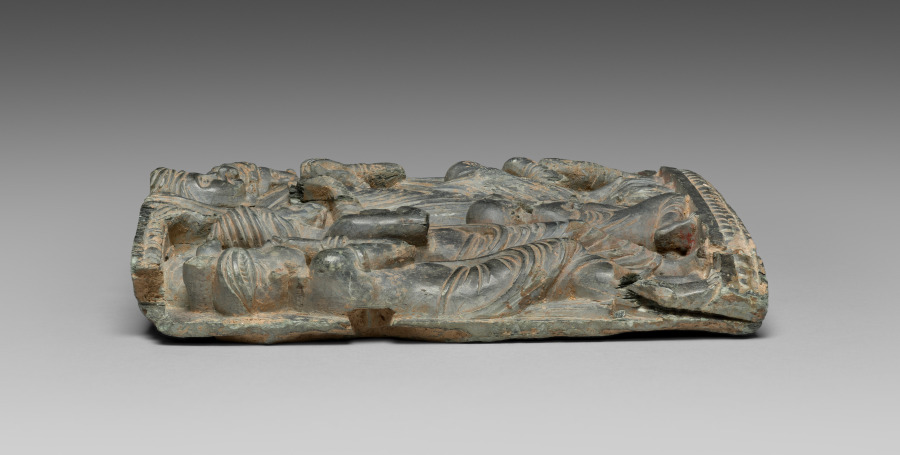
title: The Great Miracle at Shravasti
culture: Pakistan, Gandhara, Peshawar Valley, early Kushan period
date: c. 100 CE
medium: schist with traces of gold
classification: Sculpture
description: After the Buddha reached enlightenment, he spent the remainder of his life traveling around northeastern India, giving teachings and performing miracles in order to convert followers and establish the Buddhist community. One of his most famous miracles is when he levitated and caused fire to leap from his shoulders and water to flow from his feet. The figures of two monks kneel in worship. Others press their hands together in a sign of devotion and submission, while the figures on the outer edges whistle and shake their upper garments, as was customary when an amazing sight was seen.